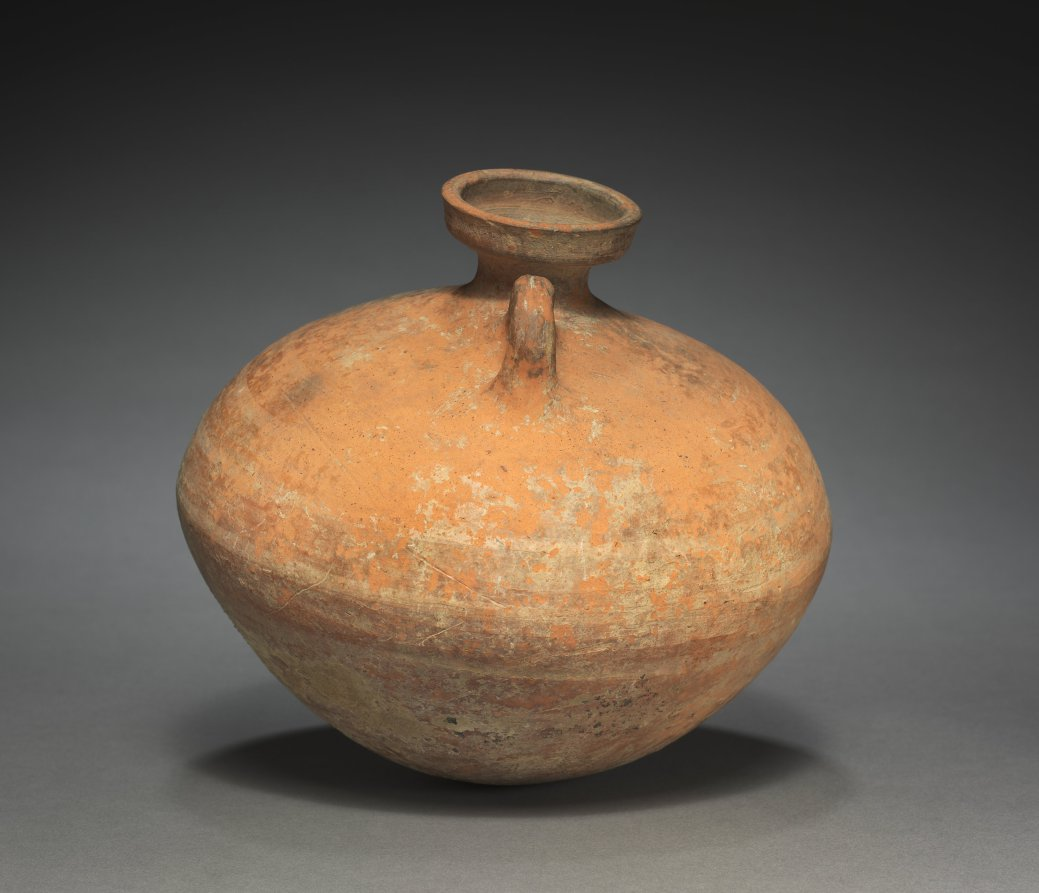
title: Rhyton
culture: Iran, Amlash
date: c. 1000–800 BCE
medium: terracotta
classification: Ceramic